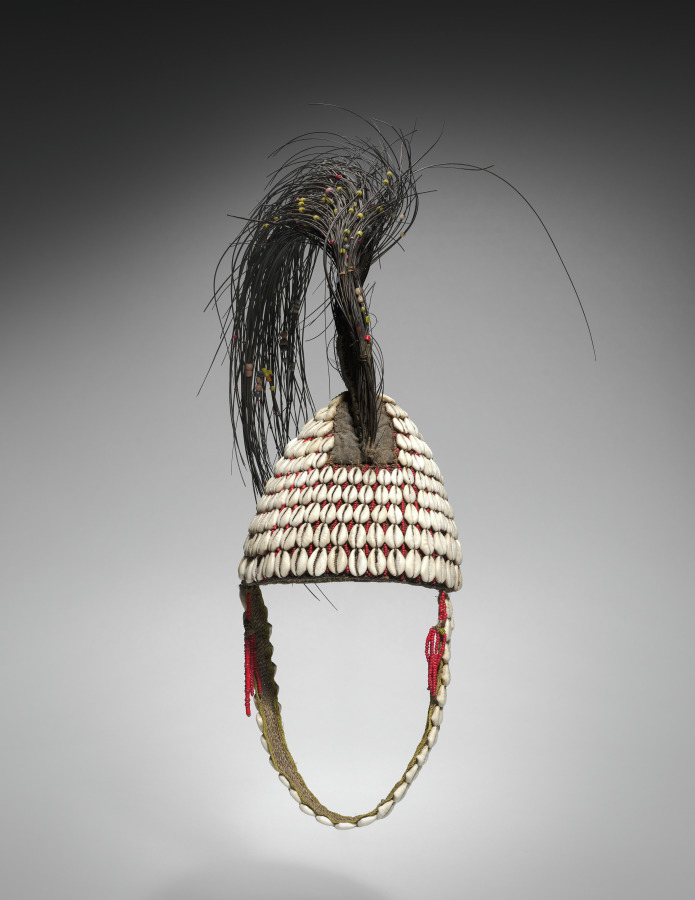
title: Bwami Prestige Cap (Mukuba or Nkumbu)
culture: Africa, Central Africa, Democratic Republic of Congo, Lega-style maker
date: early to mid-1900s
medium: Plant fibers, elephant rawhide and hair, cowrie shells, glass beads, and cord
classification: Garment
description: Hats of different types, sizes, and materials figure prominently in the Lega people’s Bwami association where they indicate status and rank. Cone-shaped hats made of canvas covered with cowrie shells and surmounted by an elephant tail are worn during initiations into kindi, the highest of the five male grades. This prestige cap uses a variety of local and imported materials to show its wearer's importance. The plant fibers that support the hat and the elephant hair were sourced in Central Africa, while the beads and cowrie shells were imported. The beads were made in Europe, while the cowrie shells came from the Indian Ocean region. The might of Bwami members is likened to the elephant’s potentially destructive strength.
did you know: While identified with Africa, cowrie shells were generally imported from the Indian Ocean region. After being collected near the Maldives islands, these Indo-Pacific shells entered parts of Africa via overseas trade routes.